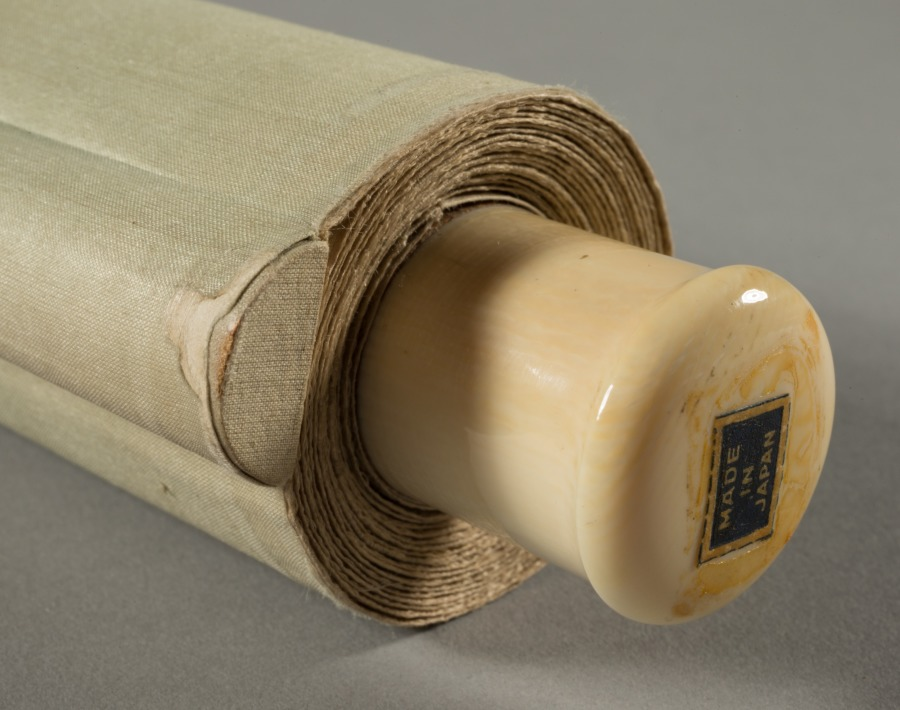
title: Fishing in Springtime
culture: Japan, Edo period (1615–1868)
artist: Ike Taiga (Japanese, 1723–1776)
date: 1700s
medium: Hanging scroll; ink and color on silk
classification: Painting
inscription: Signature: 霞樵, transliteration, Kashō; seals: 池無名印, transliteration, Ike Mumei in; 三岳道者, transliteration, Sangaku Dōja; 遵生, transliteration, Junsei.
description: Ike Taiga was subject to many artistic influences; we know he practiced Zen calligraphy from an early age, his father may have had ties to the famous painter Ōgata Kōrin (1658–1716), he may have trained under a Tosa school painter, and he is thought to have seen Western images early on that informed his approach in representing depth. Though he started with professional beginnings—making a living after his father’s death by selling paintings on fans—he surrounded himself with the members of the literati community, and never stopped absorbing stylistic influences from diverse sources throughout his career. As a result, his style is unique and aesthetically definitive of nanga—the name given to Japanese literati painting.